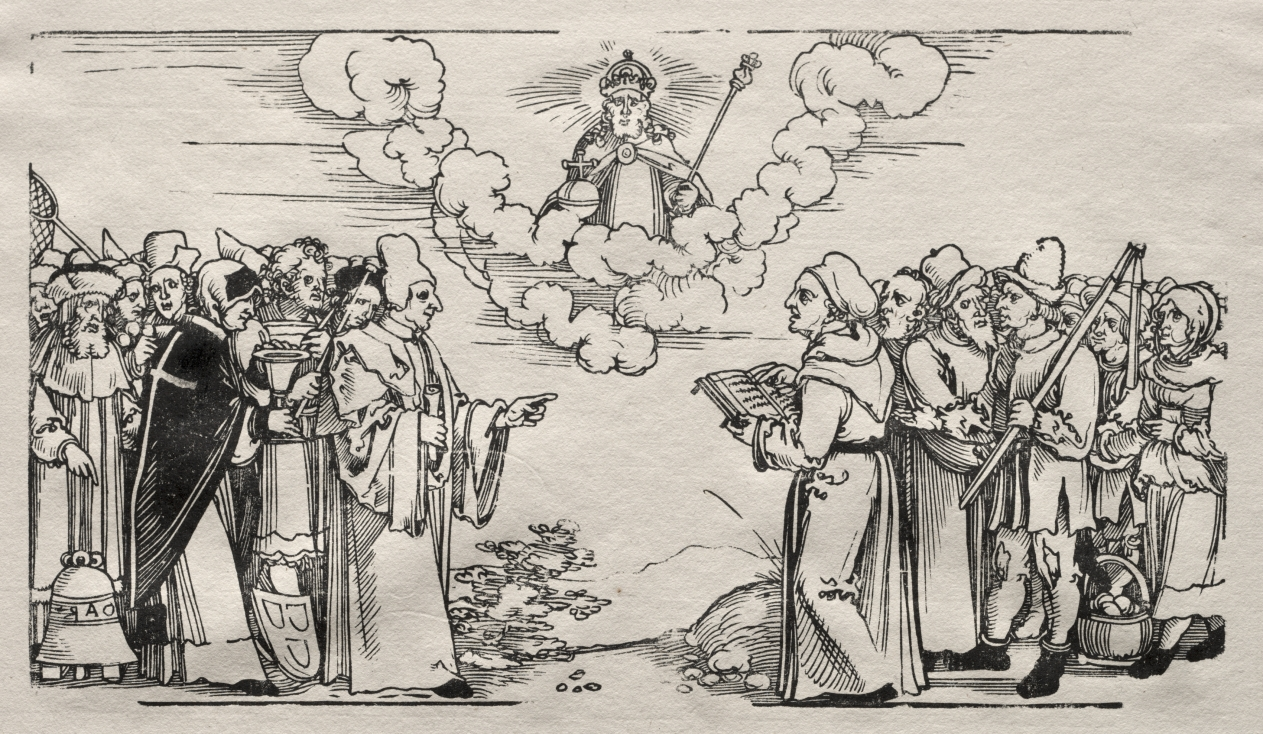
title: Dispute between Luther and a Catholic Theologian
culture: Germany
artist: Hans Sebald Beham (German, 1500–1550)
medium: woodcut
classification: Print